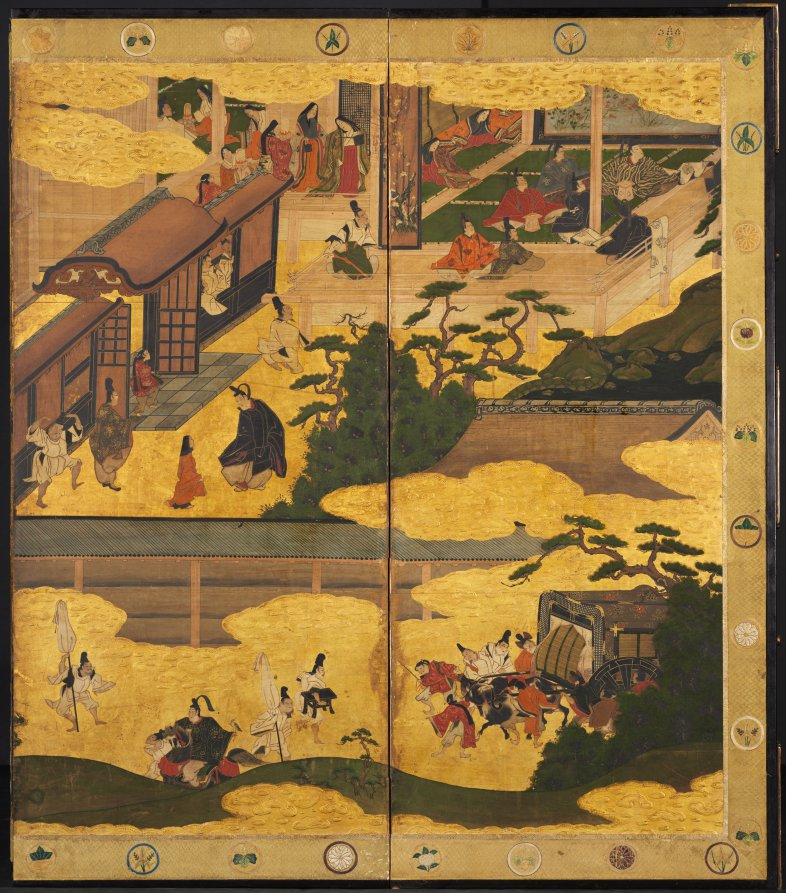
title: Scenes from the Tales of Ise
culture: Japan, Edo period (1615–1868)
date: mid-1600s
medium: One of a pair of six-panel folding screens; ink, color and gold on paper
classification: Painting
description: While the 11th-century Tale of Genji is universally regarded as Japan's literary masterpiece, the source for visual imagery in Japanese culture is rivaled by another literary classic, the Tales of Ise. A 10th-century anthology of poems interspersed with commentary, the Ise portrays the emotional and geographical journey of a courtier from the capital (Kyoto) into the countryside and beyond. The poems describe features of the natural, untamed terrain, linking them to the rather melancholy state of the traveler. Since the Tales of Ise was—and remains today—well read by educated Japanese, a person viewing these folding screens would immediately recognize its subject, organized as a series of discrete scenes read from right to left. Neither a signature nor a seal identifies the artist, but judging from related paintings, the work can be ascribed to an artist working in Kyoto during the first quarter of the 17th century in the manner of the painter Iwasa Matabei (1578–1650). This type of historical narrative composition became quite popular around 1600 among patrons favoring a distinctly Japanese style of painting which employed rich mineral pigments and a liberal use of gold.